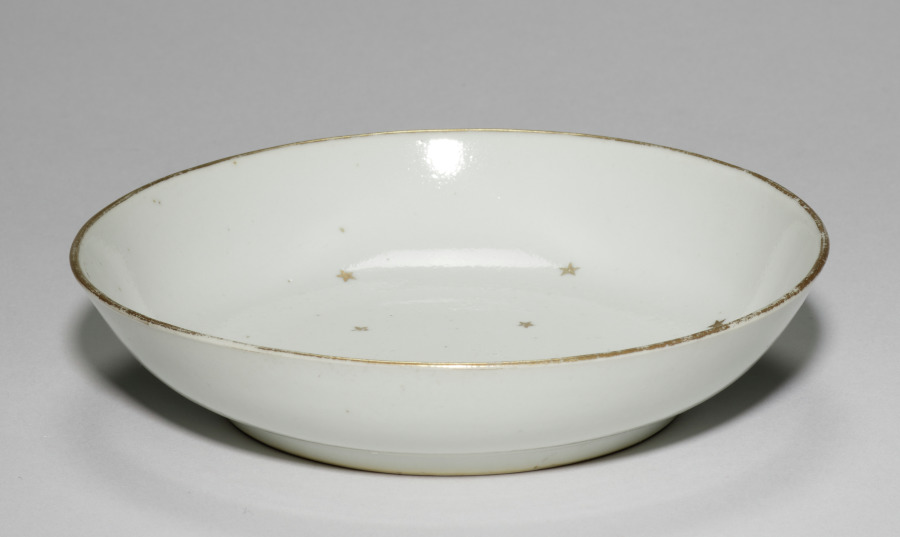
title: Saucer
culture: China, Chinese Export, 19th century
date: 1800s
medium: porcelain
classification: Ceramic